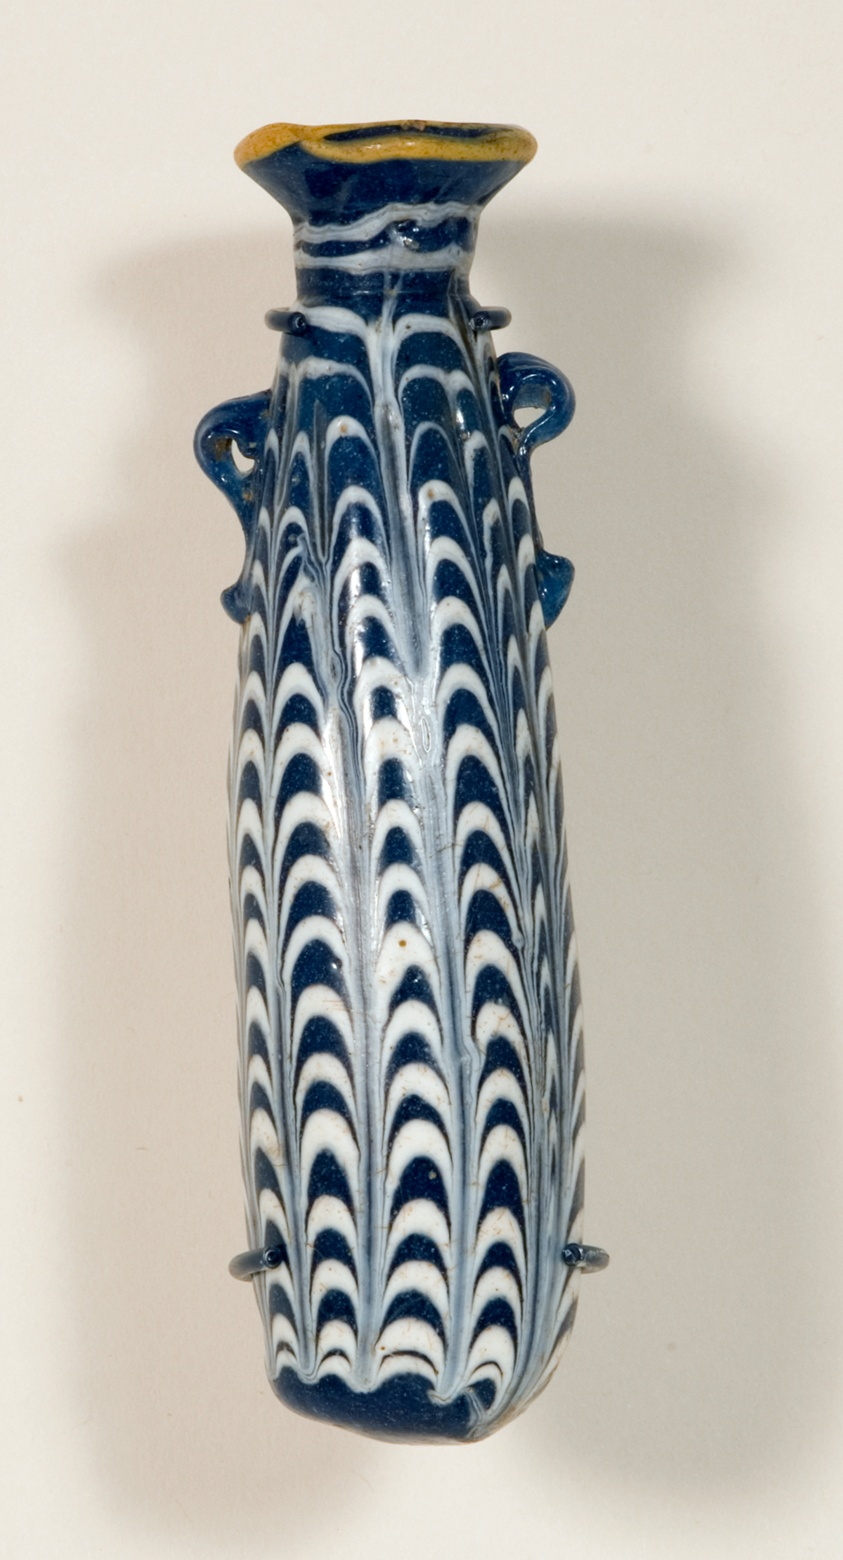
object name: Vessel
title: Alabastron (Container for Scented Oil)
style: ancient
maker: Eastern Mediterranean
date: late 6th-early 3rd century BCE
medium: Glass, core-formed technique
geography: Eastern Mediterranean Region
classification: container; alabastron; glass; vessel; ancient art